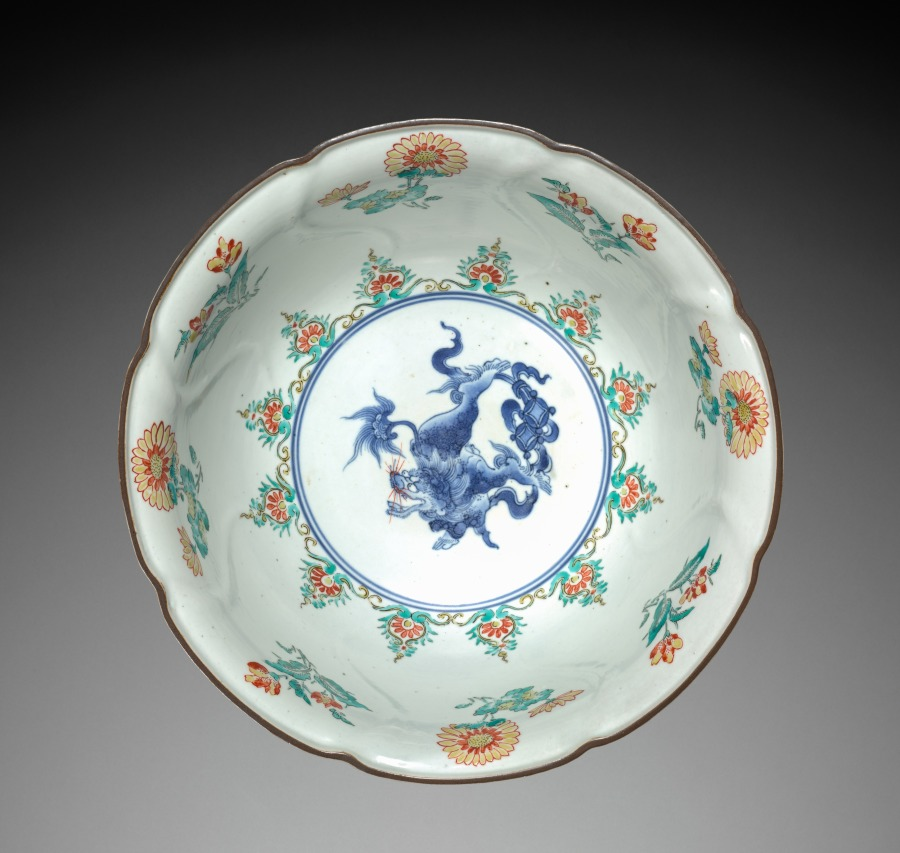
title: Bowl with Lion and Flowers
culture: Japan, Edo period (1615–1868)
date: 1700s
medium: porcelain, molded, with underglaze blue and overglaze color enamel (Hizen ware, Kakiemon type)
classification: Ceramic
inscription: 金